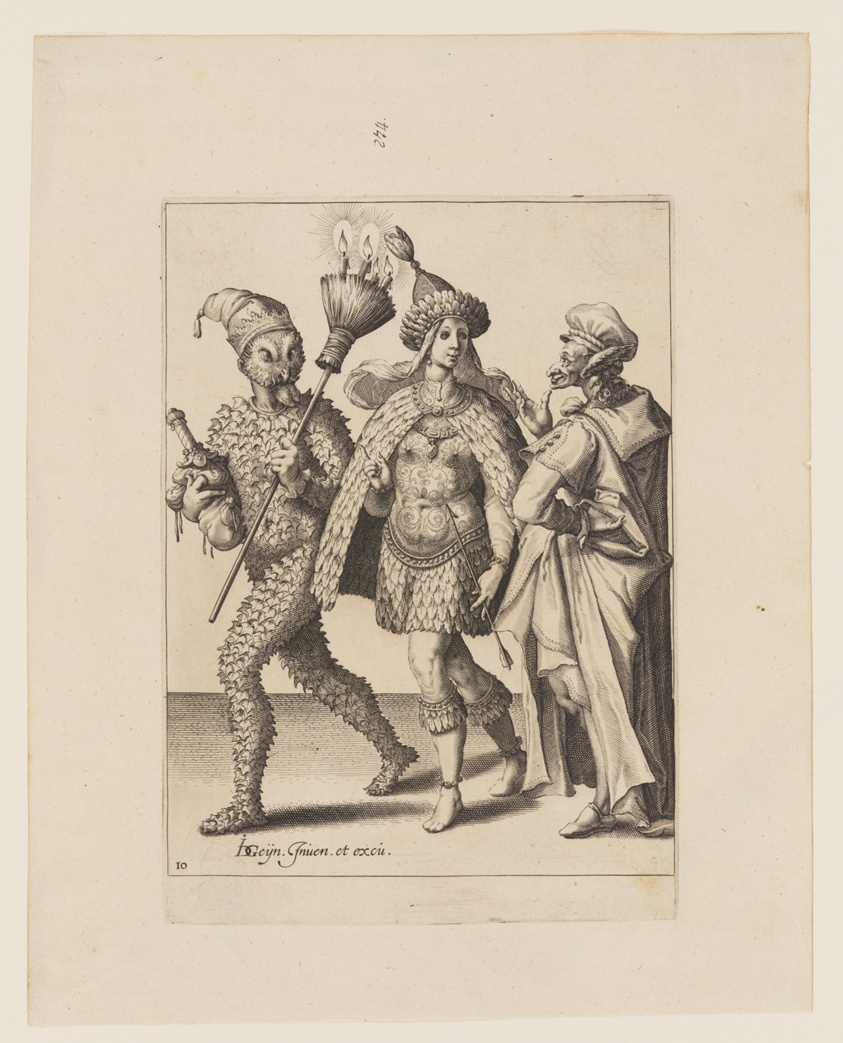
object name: Print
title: An Old Mummer Addressing a Couple Dressed in Leaves and Bird Feathers, from The Masquerades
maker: Jacques de Gheyn II; Dutch, 1565–1629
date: 1595-96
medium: Engraving on ivory laid paper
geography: Netherlands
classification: engraving; paper; print; prints and drawing